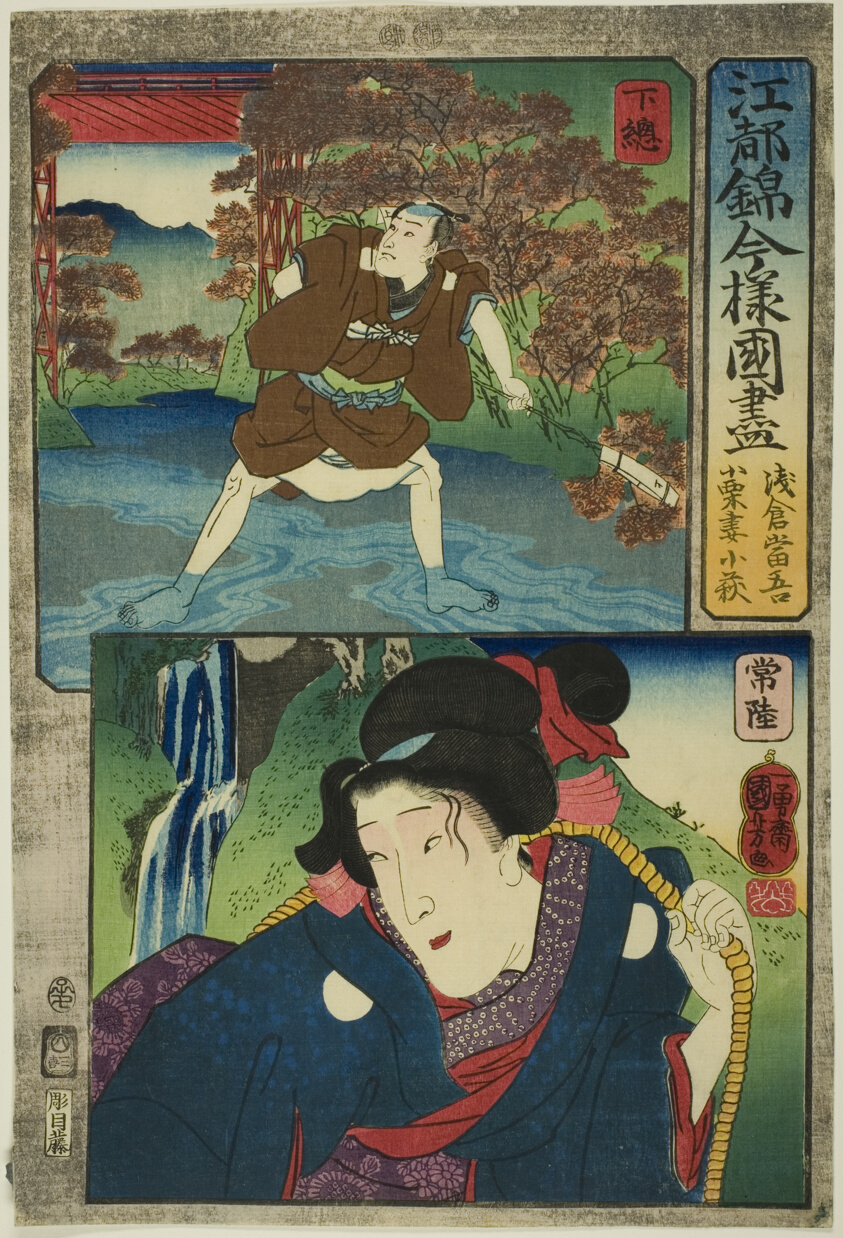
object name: Print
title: Shimosa Province: Asakura Togo and Hitachi Province: Oguri's Wife Kohagi, from the series "Modern Scenes of the Provinces in Edo Brocades (Edo nishiki imayo kuni zukushi)"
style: Japanese (culture or style)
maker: Utagawa Kuniyoshi (Japanese, 1797-1861)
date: 1852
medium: Color woodblock print; oban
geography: Japan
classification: woodblock print; print; asian art